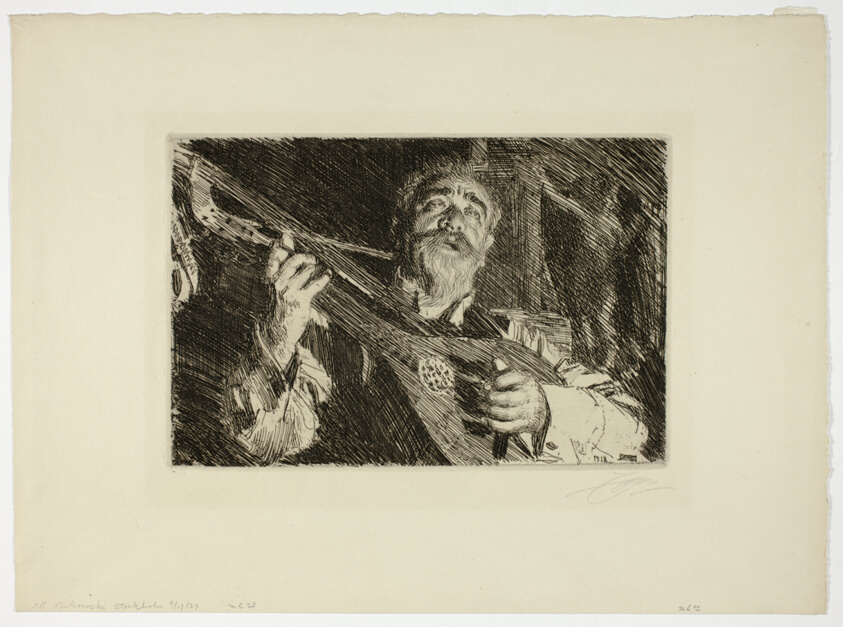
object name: Print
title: Vicke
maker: Anders Zorn (Swedish, 1860-1920)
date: 1918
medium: Etching on ivory laid paper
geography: Sweden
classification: etching; print; prints and drawing